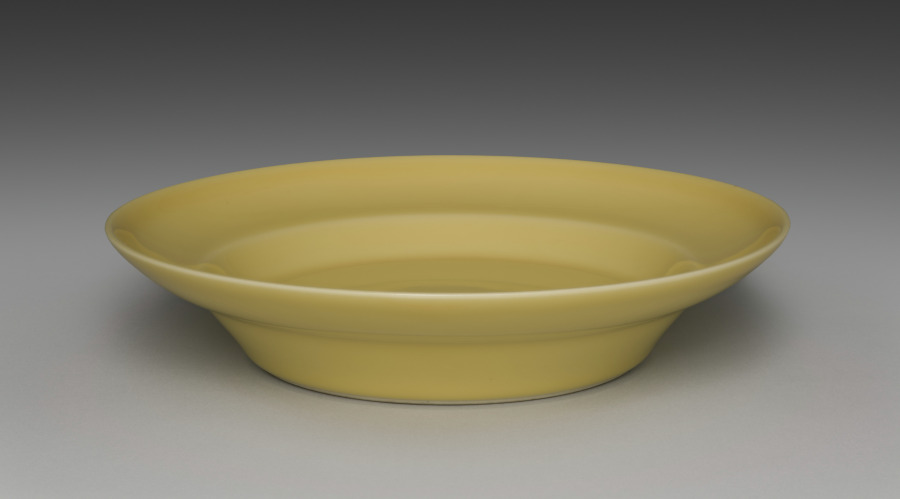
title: Sweets Bowl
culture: Japan, Meiji period (1868–1912)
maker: Seifū Yohei III (Japanese, 1851–1914)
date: 1893–1914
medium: Glazed porcelain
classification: Ceramic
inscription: 清風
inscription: 金聲玉振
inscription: 帝室技芸員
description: Seifū Yohei III was the most prominent head of a ceramics studio in Kyoto that specialized in Chinese-style porcelains and especially items for use in sencha (煎茶), or the drinking of steeped-leaf tea with companions. Sencha was popular among the bunjin of Kyoto and Osaka, who often enjoyed it as part of their emulation of Chinese culture. While sencha was by design less formal than the Japanese tea ceremony, it still featured the display of treasured objects. Prized Chinese antiquities were generally unobtainable, so substitutes such as the Gu-Shaped Flower Vase, CMA 2022.224, were much in demand. Bowls for distributing sweets, like this one, were also a staple of sencha gatherings.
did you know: Names for the glazes, written in ink with a brush on the lids of the custom-made storage boxes for the works, often indicate a specific glaze or ware that had inspired Seifū Yohei III.